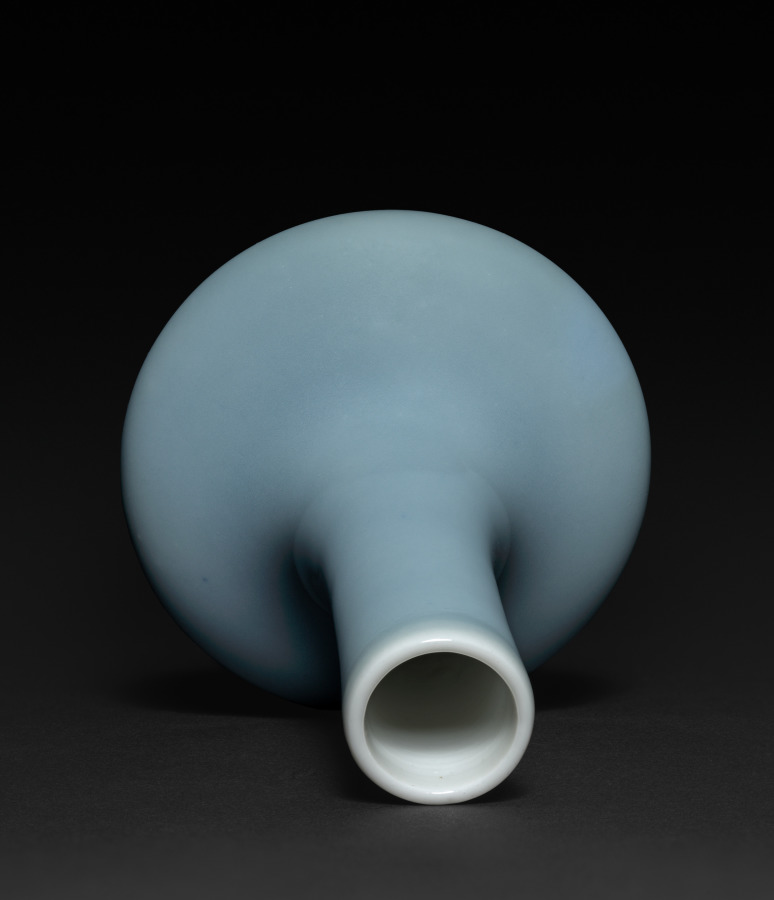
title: Bottle-Shaped Vase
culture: China, Qing dynasty (1644-1911), Kangxi reign (1661-1722)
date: 1661–1722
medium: porcelain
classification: Ceramic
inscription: 大清康熙年製